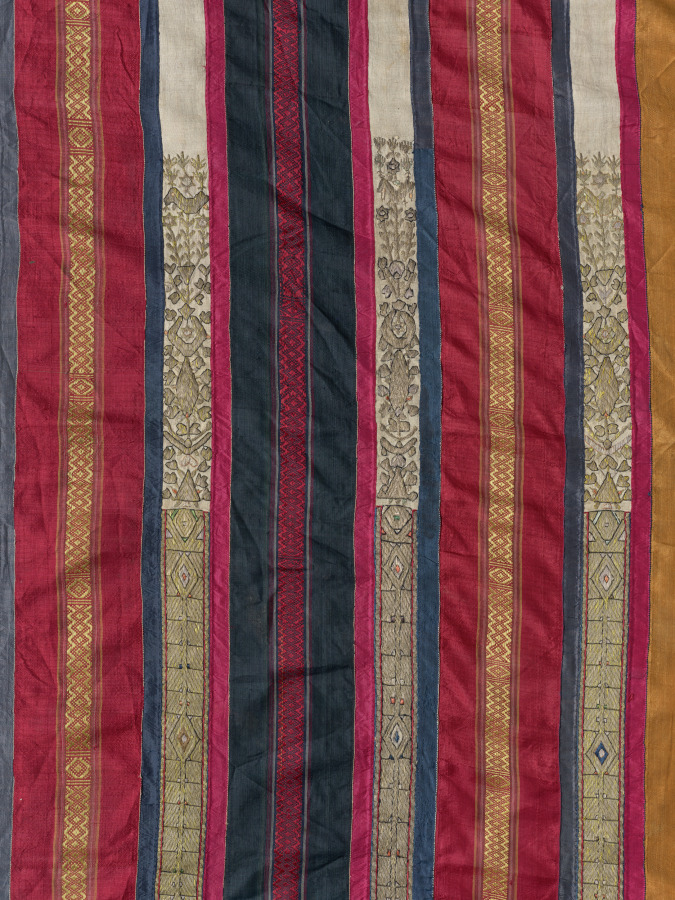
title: Curtain (one of a pair)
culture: Africa, North Africa, Tunisia, Djerba, Tunisian weaver(s) and embroiderer(s)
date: 1600s–1700s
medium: Silk, linen, metal, and dye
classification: Embroidery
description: One of a pair, this curtain displays colorful silk bands with woven geometric motifs, and cream bands with gold-embroidered plants, birds, six-pointed stars, and the khamsah (خمسة), an open five-fingered hand. Birds and the tree of life were popular good luck or fertility symbols linked to marriage. This curtain’s cosmopolitan motifs would have resonated with Jews, Muslims, and Christians alike, reflecting its creation on multiethnic and multireligious Djerba, an island off the Tunisian coast. There, both goldsmithing and gold thread embroidery were done by Jewish artisans (male and female, respectively). The fine materials suggest this curtain once hung in a wealthy home or for special occasions; interior wall hangings were typically made from rough wool.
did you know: When first acquired over a century ago, this curtain had fringe at its lower end.